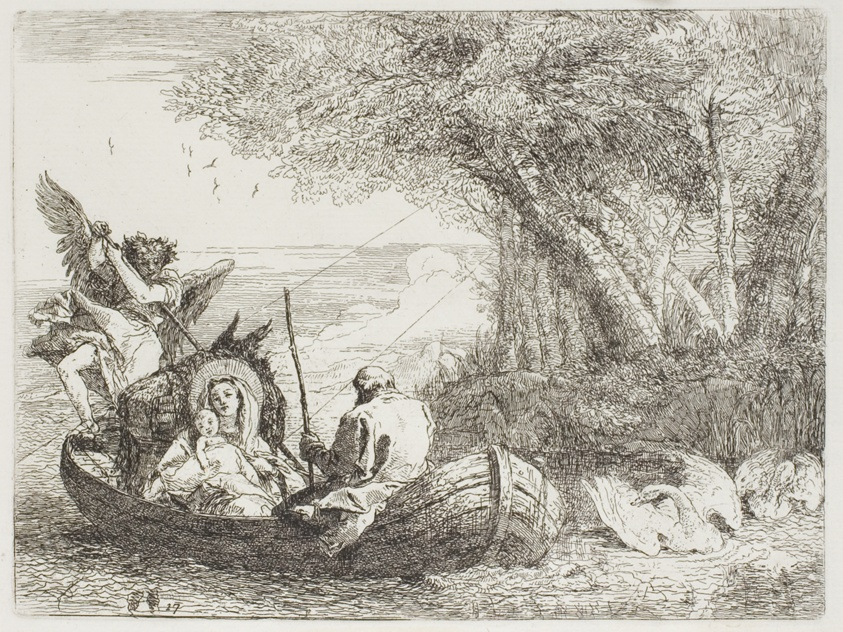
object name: Print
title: The Holy Family Crossing the Lake in the Boat, plate seventeen from The Flight into Egypt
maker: Giovanni Domenico Tiepolo (Italian, 1727-1804)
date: 1753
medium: Etching on paper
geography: Italy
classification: etching; print; prints and drawing